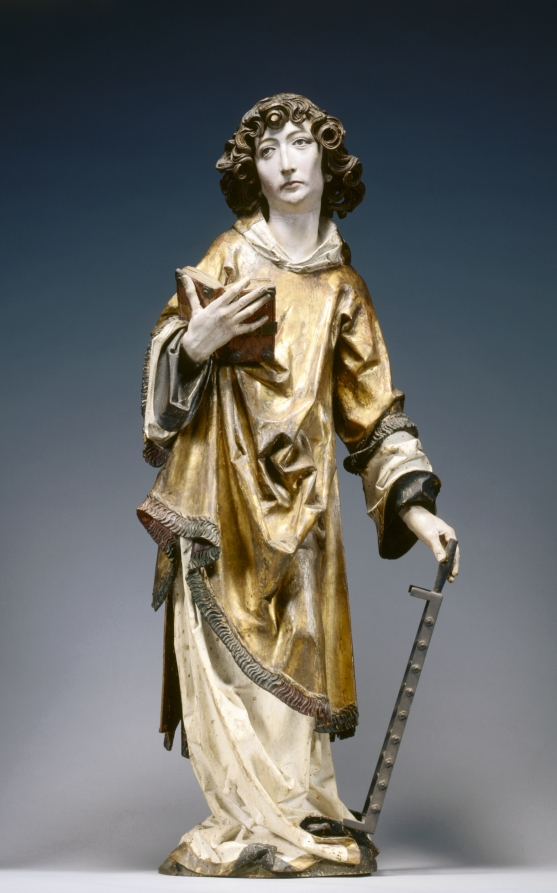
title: Saint Lawrence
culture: Germany, Würzburg, 16th century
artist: Tilman Riemenschneider (German, active Würzburg, c. 1460–1531)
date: 1502–8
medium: lindenwood with polychromy and gilding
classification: Sculpture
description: This sculpture, along with that of Saint Stephen (1959.43), and two female saints preserved in Frankfurt (Historisches Museum), are believed to be the remaining fragments of a large altarpiece carved by Riemenschneider for the Dominican convent in Rothenburg in Franconia (demolished in 1813). Saints Stephen and Lawrence both wear the dalmatic to indicate their status as deacons in the early church. Each holds a symbol of his martyrdom; here, Saint Lawrence holds a grill to indicate his death by burning. Late Gothic Style Art in Germany through the early 1500s remained firmly anchored in the late Gothic style with its associated interests in realism. Riemenschneider was one of the most prolific and versatile sculptors of this style, a recognized master in both stone and wood. His flourishing workshop employed as many as 40 apprentices in sculpting, woodcarving, and painting. His sculptures are noted for the dreamy, melancholy, and introspective quality in their expressions, as well as their remarkable attention to detail.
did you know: Before Riemenschneider finally settled in Würzburg, Germany, in 1484, he traveled to Strasbourg and Colmar, where he became acquainted with the works of the engraver Martin Schongauer.